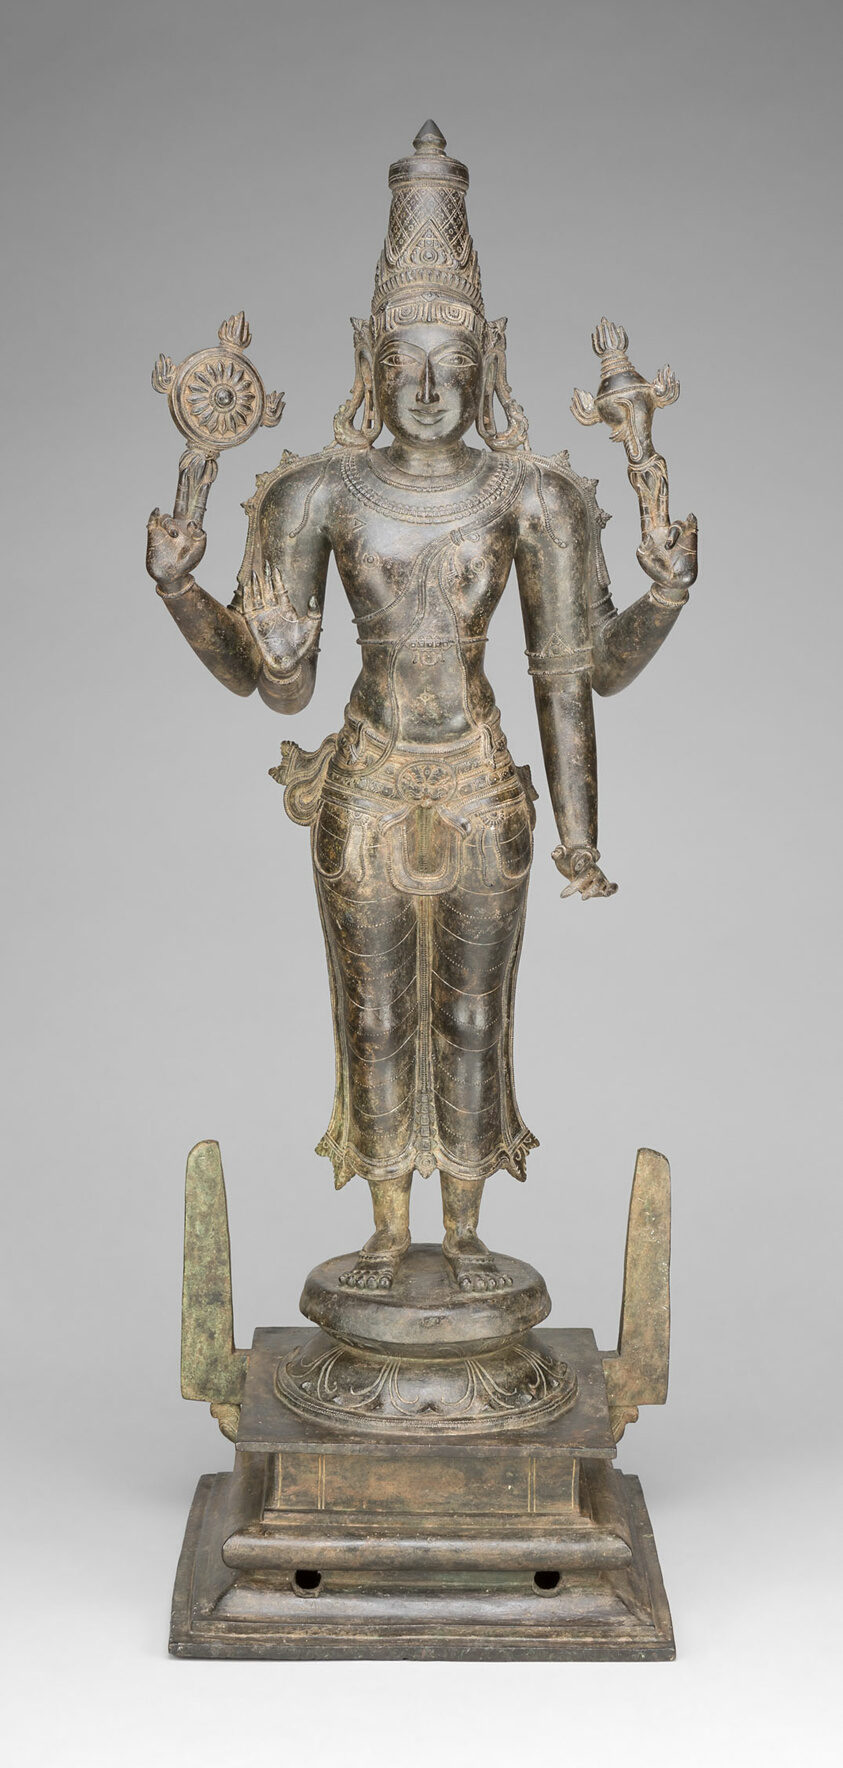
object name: Sculpture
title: Four-Armed God Vishnu Holding Discus and Conch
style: South Asian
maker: India; Tamil Nadu, Thanjavur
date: Vijayanagar period, 15th century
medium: Bronze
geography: Thanjavur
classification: bronze; metal; sculpture; asian art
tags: Vishnu